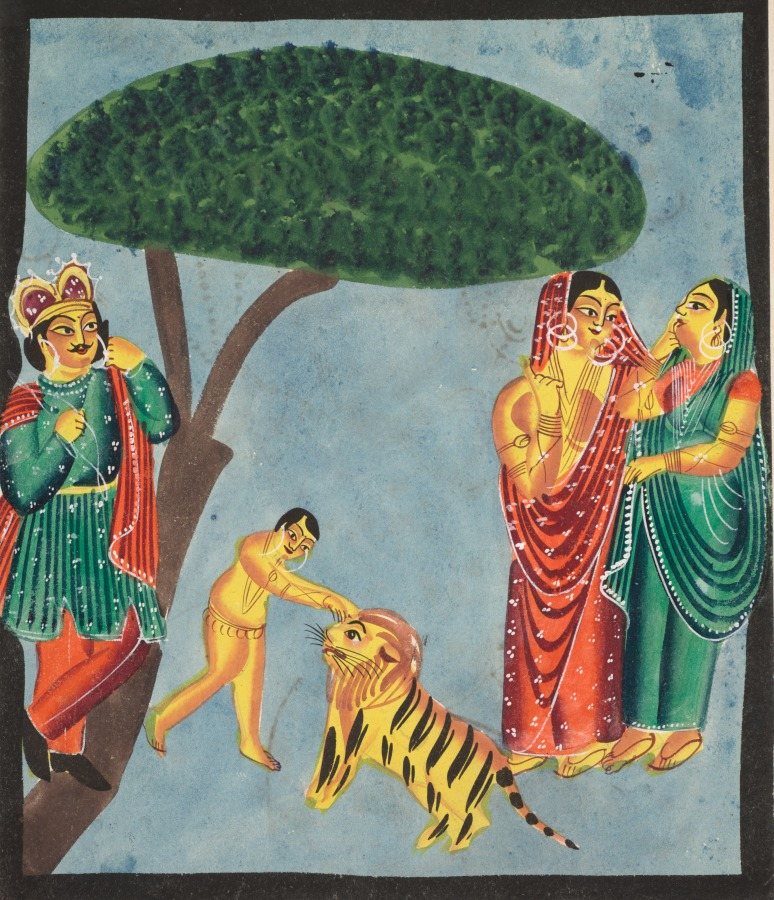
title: Dushyanta watching his son Bharat playing with the tiger at the end of the Abhijnanashakuntalam (verso), from a Kalighat album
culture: Eastern India, Bengal, Kolkata, Kalighat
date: c. 1890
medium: Gum tempera, graphite, ink, and tin on paper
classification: Painting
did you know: The women at the right are probably Dushyanta's wife Shakuntala and her mother Menaka.